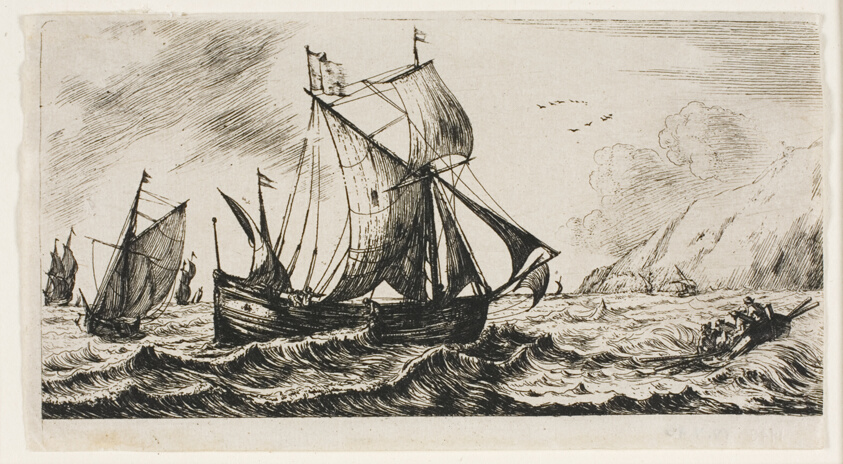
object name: Print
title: The Galliot of Jean de Vyl of Rotterdam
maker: Charles Meryon (French, 1821-1868); after Reinier Nooms (Dutch, c. 1623-c. 1664)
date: 1850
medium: Etching, engraving and roulette on ivory laid paper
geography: France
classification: etching; print; prints and drawing